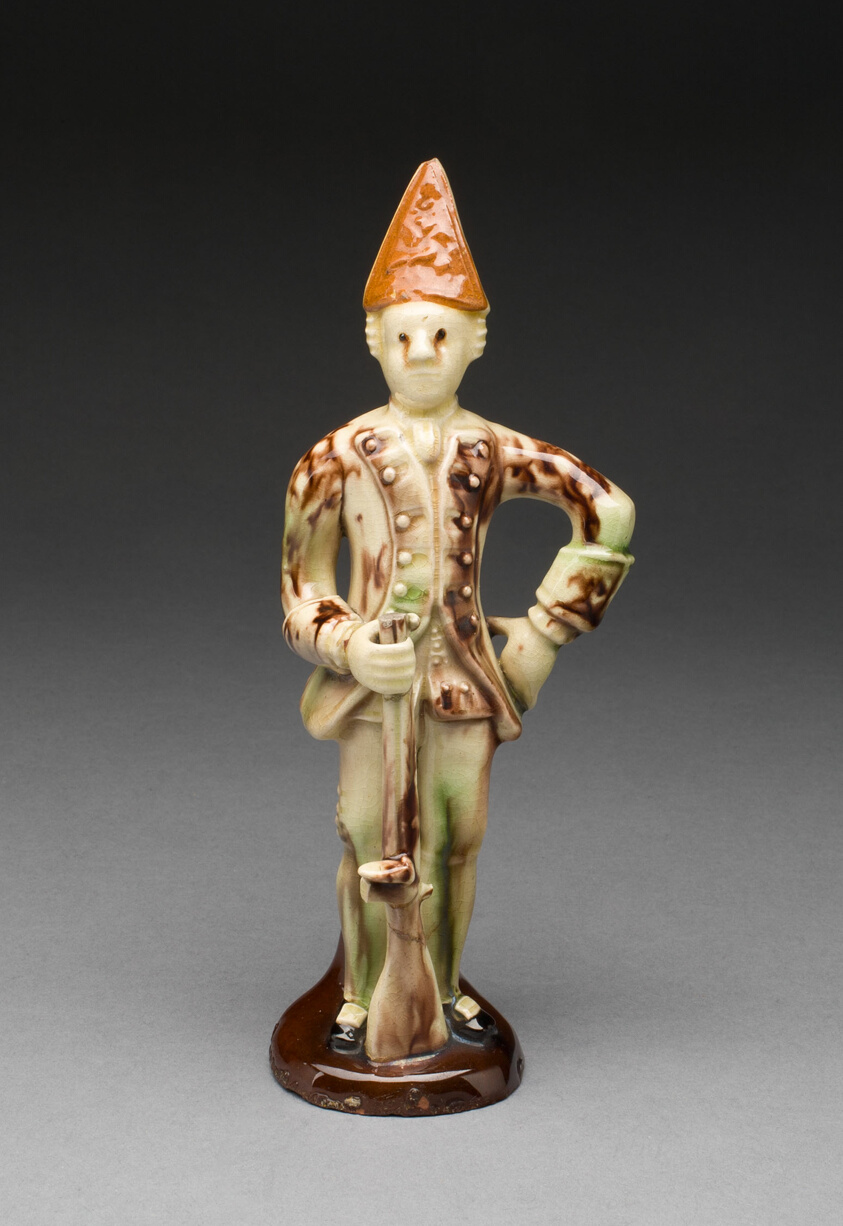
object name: Ceramics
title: Soldier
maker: England, Staffordshire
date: 1750/70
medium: Lead-glazed earthenware (creamware and redware)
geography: Staffordshire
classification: earthenware; redware; creamware; european decorative arts; ceramics; lead-glazed earthenware